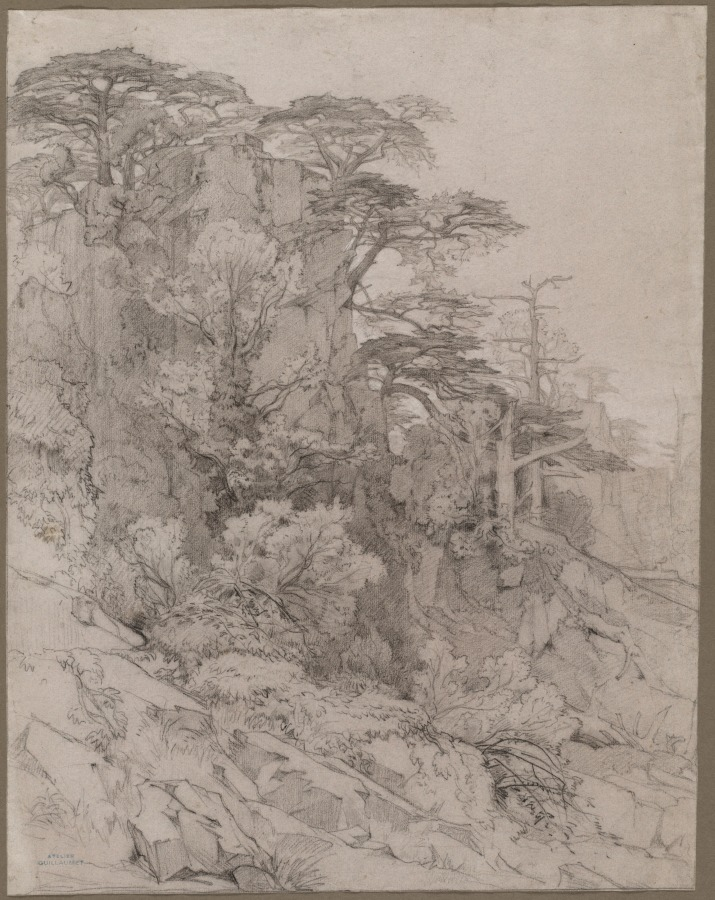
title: Trees of a Rocky Hillside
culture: France, 19th century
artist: Gustave Achille Guillaumet (French, 1840–1887)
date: late 1800s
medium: black chalk heightened with white chalk; framing lines in graphite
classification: Drawing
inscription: VERSO, upper right, in grpahite: I 300F ; lower right, in graphite: 206 [sideways] ; lower right, in graphite: [illegible] ; lower right, in graphite: 30 x 23 ; lower right, in graphite: D849HAA 1/2 S